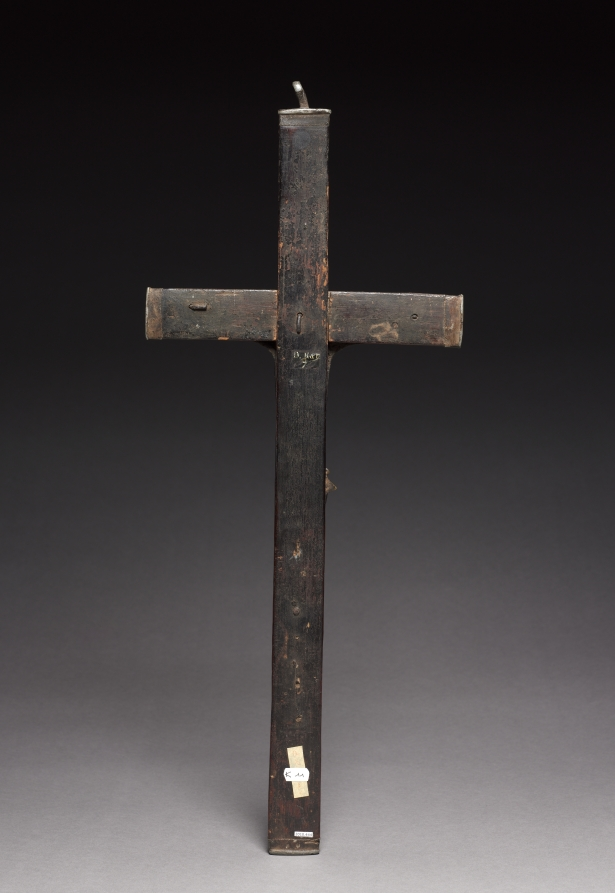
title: Crucifix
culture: Africa, Central Africa, Kongo Kingdom, Kongo-style maker(s)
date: late 1800s-early 1900s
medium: Copper alloy, wood, upholstery studs, and iron alloy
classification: Sculpture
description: An artist made this crucifix from wood and metal centuries after Catholicism became the Kongo Kingdom’s official faith. Following King Nzinga a Nkuwu's 1491 decision to convert, Kongo Christianity uniquely reflected its surroundings. While early Christ images arrived from Portugal and Italy, this later local example has braids like a Kongo man. Worn smooth by repeated touch, the lower figure is the Virgin Mary or a worshiper knelt in mourning or respect. The x-shape incised into his waist wrapper references the dikenga dia Kongo. This likely pre-Christian symbol diagrams the life cycle's four points.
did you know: This x-shapes of the cross and on Christ's wrapper are forms with symbolic meaning tied to the life cycle in both Catholicism and in the indigenous Kongo religion.